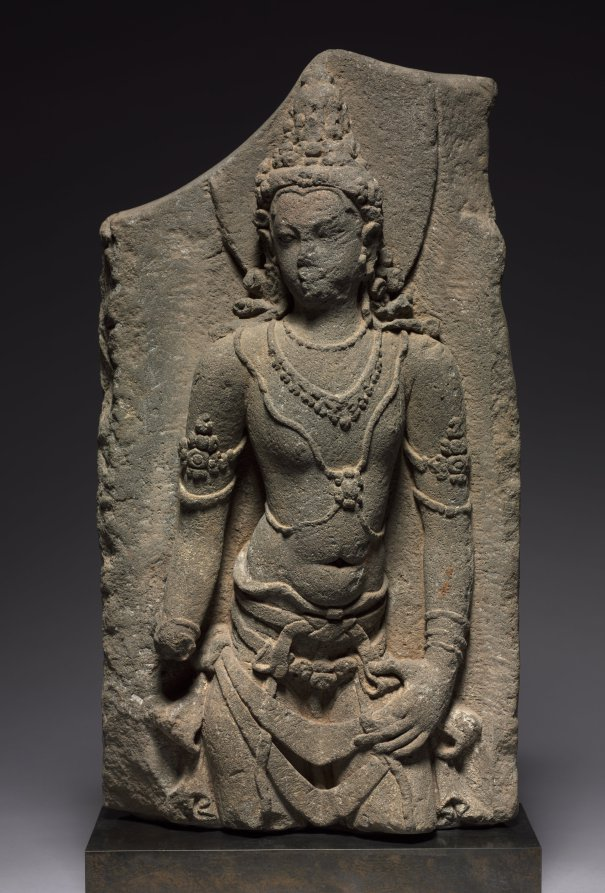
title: Door Guardian, Mahakala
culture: Indonesia, Central Java, Chandi Suko, 9th century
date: 800s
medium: volcanic stone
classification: Sculpture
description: The natural stance of this richly adorned figure indicates that he served as an attendant: the face turns to his right, while his midsection turns to the left, and the weight is on his right leg. A plain ovoid halo indicates that he is divine. The broken right hand may have held an implement or weapon that would aid in a more precise identification.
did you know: The crossed chest ornament, called a "channavira" in Sanskrit, denotes power and valor.